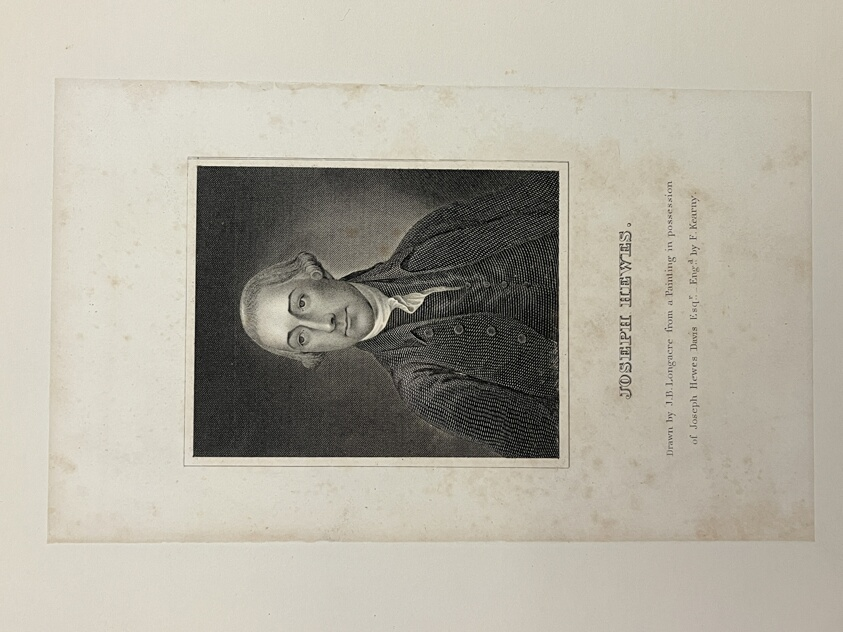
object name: Print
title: Joseph Hewes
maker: Francis Kearny (American, died 1837); after James Barton Longacre (American, 1794-1869)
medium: Steel engraving on paper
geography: United States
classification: reproduction; print; prints and drawing